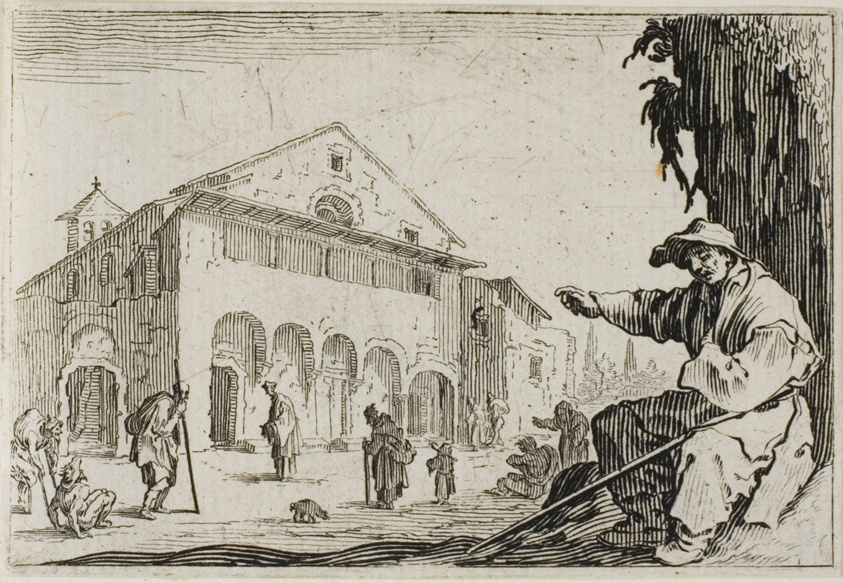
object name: Print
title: The Home, from The Caprices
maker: Jacques Callot (French, 1592-1635)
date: c. 1622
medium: Etching in black on ivory laid paper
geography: France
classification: etching; print; prints and drawing